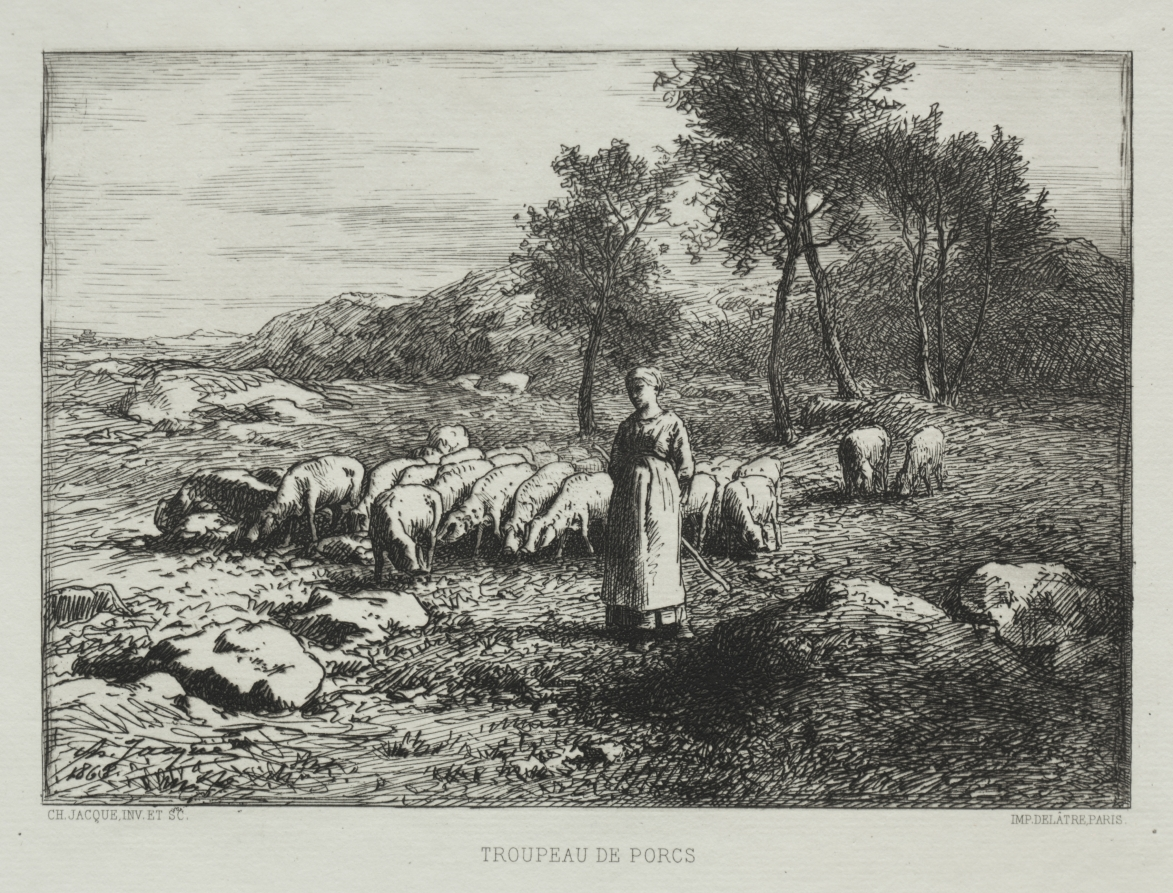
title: Herd of Swine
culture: France, 19th century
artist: Charles-Émile Jacque (French, 1813–1894)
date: 1868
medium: etching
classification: Print